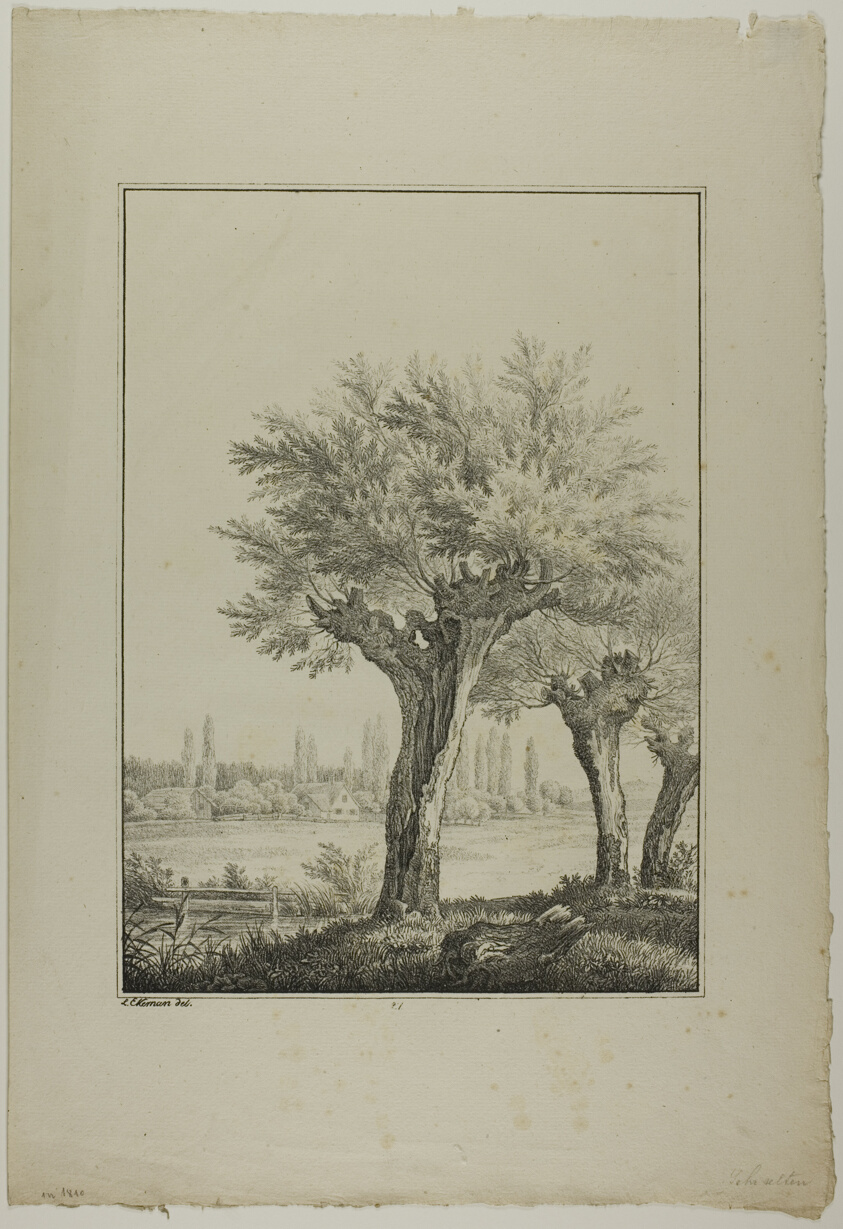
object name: Print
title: Plate 27 from Blatt Baum und Landschafts Studien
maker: Lorenz Ekemann Alesson (Swedish, 1791-1828)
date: c. 1810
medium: Lithograph on paper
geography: Sweden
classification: lithograph; print; prints and drawing